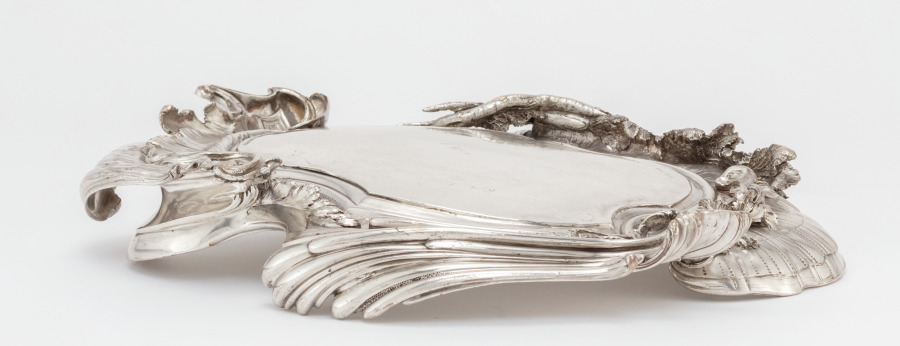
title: Stand for a Covered Tureen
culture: France, Paris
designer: Juste-Aurèle Meissonnier (French, 1695–1750)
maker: Pierre-François Bonnestrenne (French)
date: 1735–38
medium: silver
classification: Silver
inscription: engraved Meissonnier signature.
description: See entry for cover record 1977.182.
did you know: The langoustine, pigeon, and vegetables were cast using real examples giving the silver copies lifelike detail and appearance.